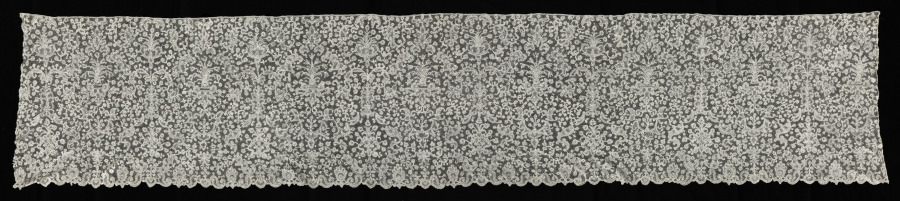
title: Bobbin Lace Flounce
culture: Flanders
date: 18th century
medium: lace, bobbin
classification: Lace